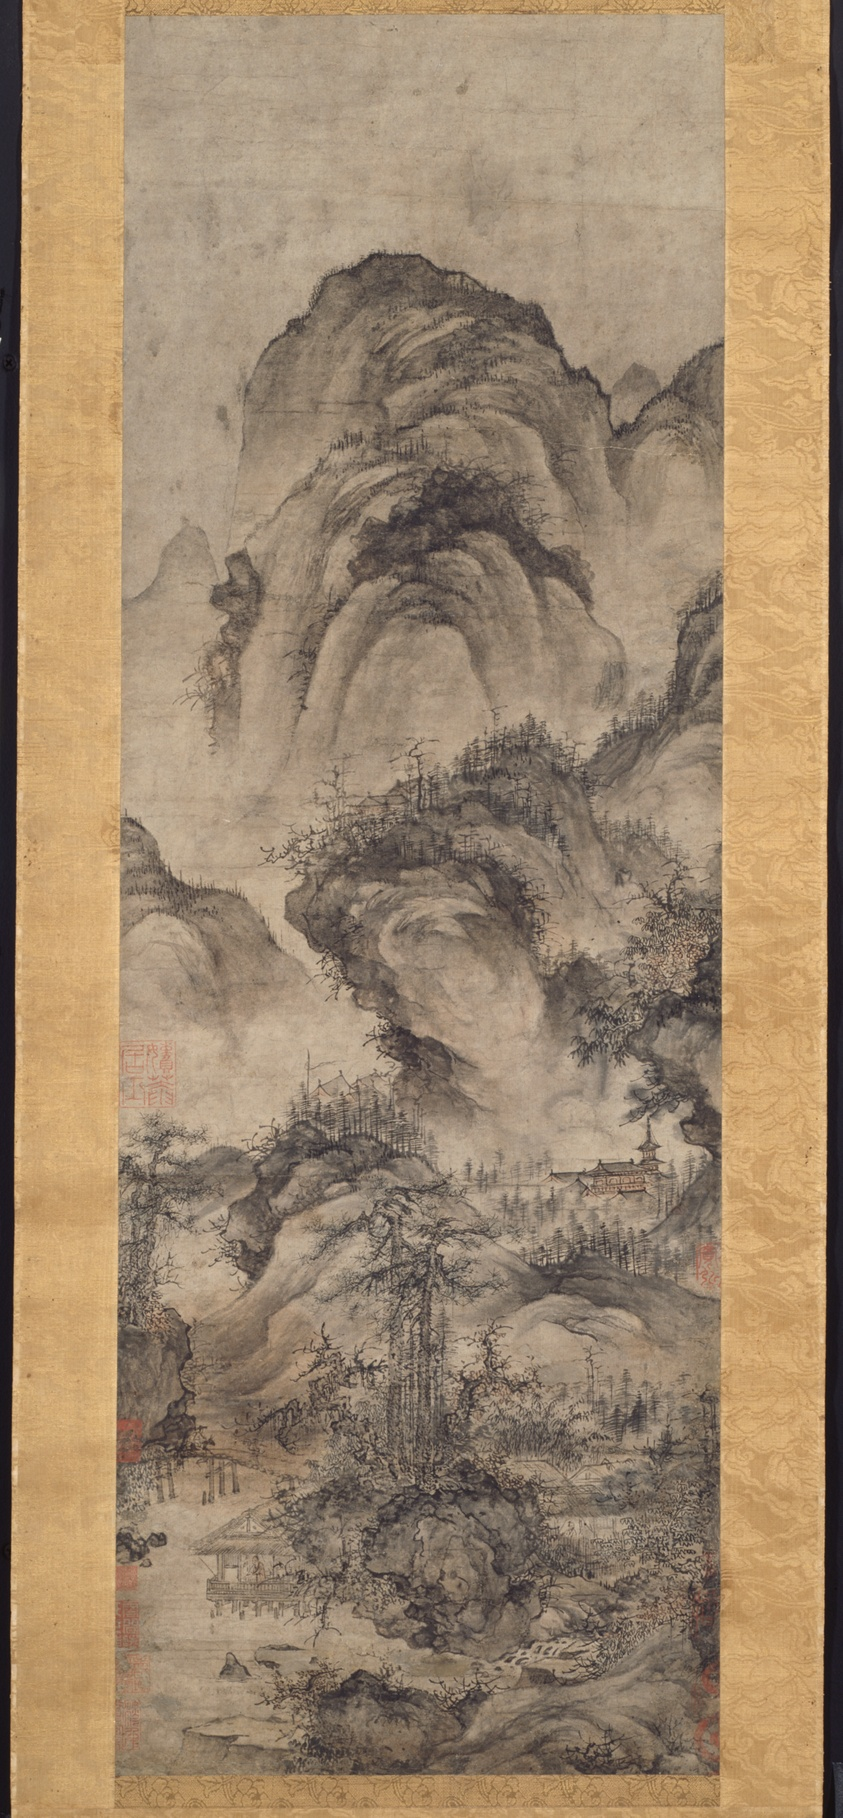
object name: Painting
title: Water Pavilion by Twin Pines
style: Chinese (culture or style)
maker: Artist unknown; Chinese, early 14th century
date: Yuan or early Ming dynasty, 14th–15th century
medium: Hanging scroll; ink and light colors on paper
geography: China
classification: hanging scroll; painting; asian art